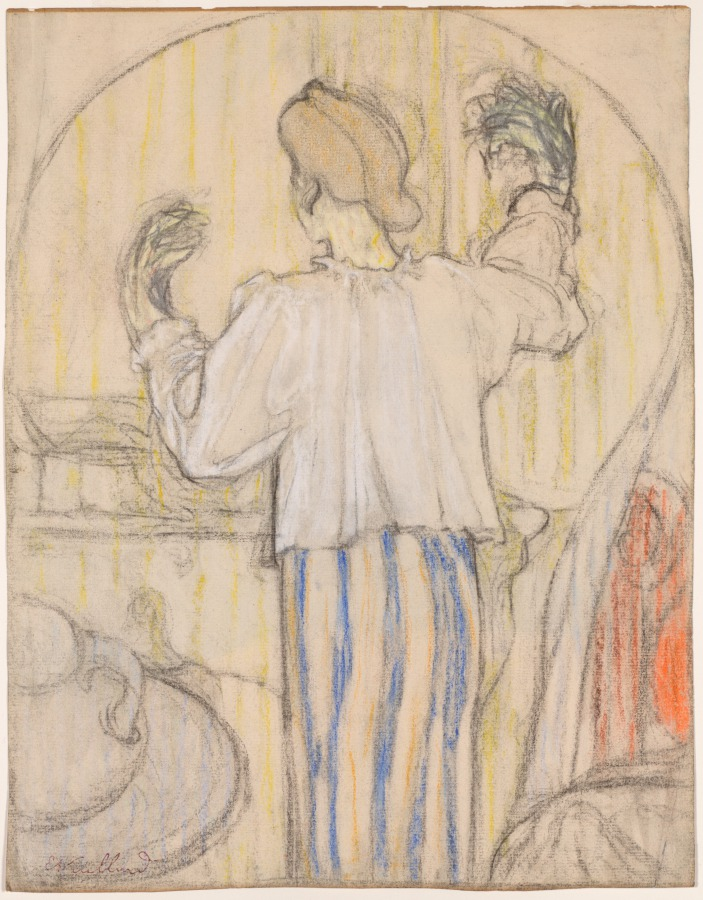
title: In Front of the Mirror (recto)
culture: France, 19th century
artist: Edouard Vuillard (French, 1868–1940)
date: c. 1891–92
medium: pastel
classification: Drawing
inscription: recto, lower left, stamped in purple ink: E Vuillard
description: During the early 1890s, Édouard Vuillard repeatedly represented his mother and older sister, Marie, in domestic settings. This drawing relates to a pastel and painting, all of which show Marie standing before a mirror, raising her arms as if to adjust her hairstyle. A charcoal study of a nude male appears on the verso, suggesting that the artist may have reused the sheet.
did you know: Vuillard created this portrait of his sister Marie while she was living at home and working with their mother at her corset- and dressmaking business.